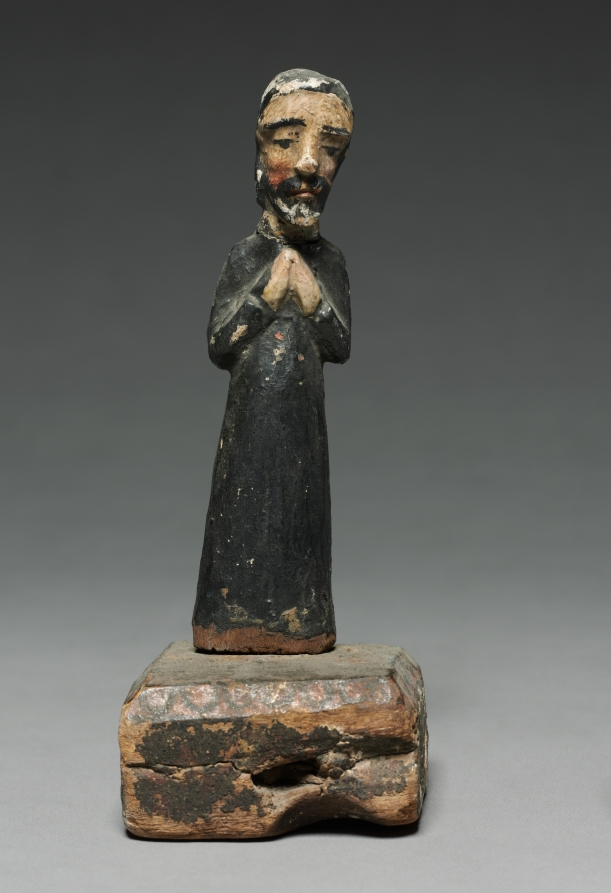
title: San Antonio: santo de bulto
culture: America, New Mexico, 17th-18th century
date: 17th-18th Century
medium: painted wood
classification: Sculpture